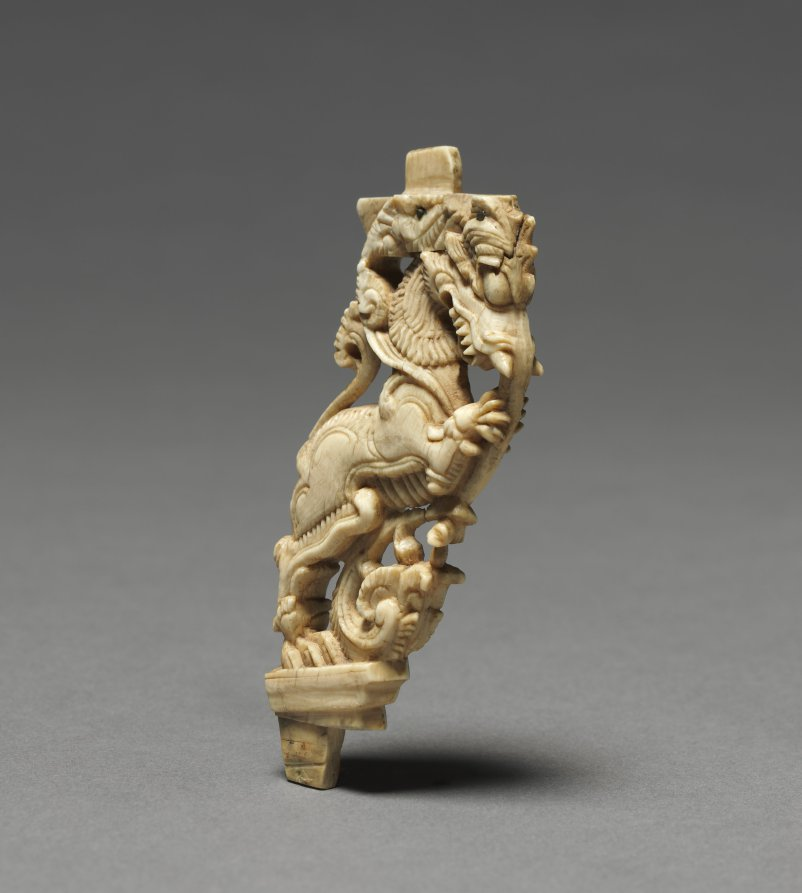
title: Carved Bracket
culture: South India, probably Madurai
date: 1600s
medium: Ivory with traces of pigment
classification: Ivory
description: Composite creatures with the body of a lion, tusks and trunk of an elephant, and horns of an antelope are standard elements of medieval Indian architecture and furniture. Traces of pigment indicate that these ivory furniture facings were brightly painted.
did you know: These creatures stand for shakti, or creative energy.